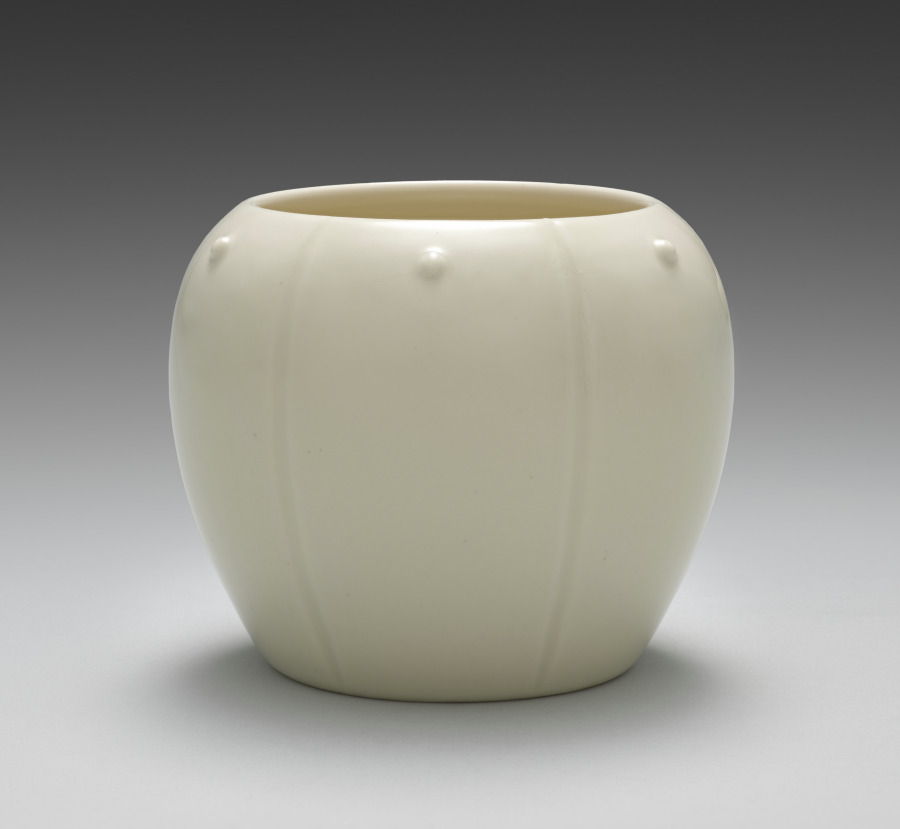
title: Container from Lit Charcoal and Ash Containers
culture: Japan, Meiji period (1868–1912)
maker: Seifū Yohei III (Japanese, 1851–1914)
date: 1893–1914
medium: One from a set of four containers; porcelain with molded design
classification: Ceramic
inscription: 清風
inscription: The storage box for this set is inscribed and impressed with seals.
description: The box lid for these six-lobed lit charcoal and ash containers, or hiire, identifies them as kōhakuji, another of Yohei III’s translucent cream colors over ivory clay bodies. One might translate the name as “lustrous pearl[–glazed ivory] porcelain.” A hiire was filled with ash with burnt coals at the center so that embers and tobacco ash could be discarded safely during a gathering. Each of the lobes on the containers has a round protrusion set below the rim. The studlike pattern is called ruiza. The term is also used to describe the pattern that rings the shoulder of some flower vases or metal kettles used in chanoyu.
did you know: The Seifu studio generally followed the standard practice in Japan for identifying the artist and object in box inscriptions.